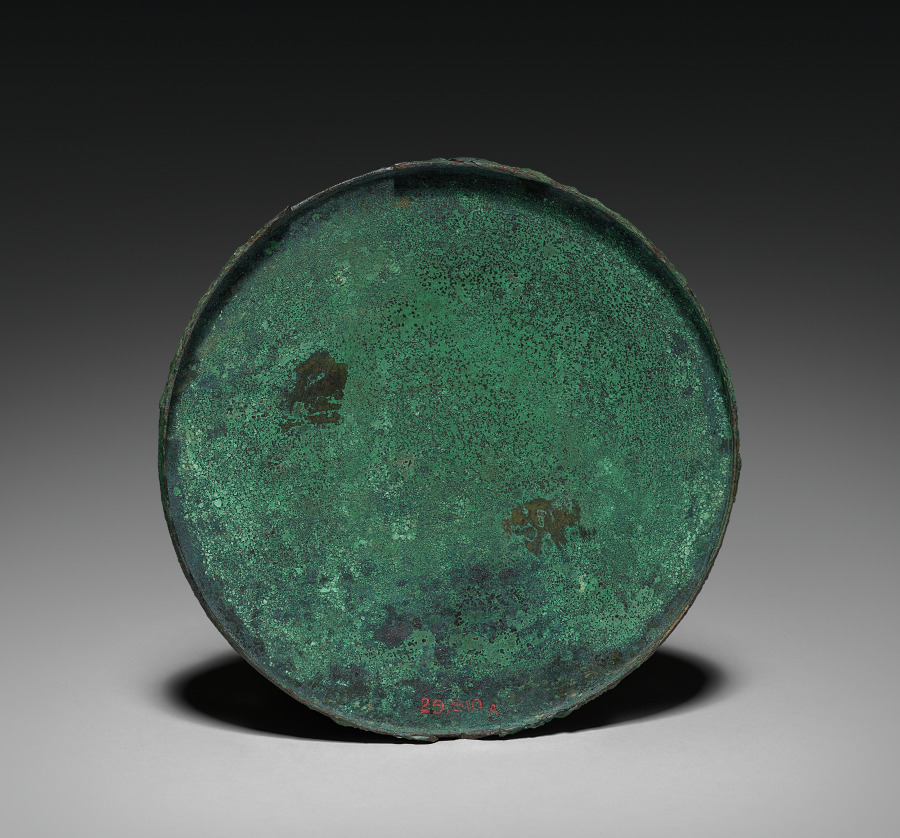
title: Mirror Case with Cover (lid)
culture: Greece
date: 300s BCE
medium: bronze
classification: Metalwork